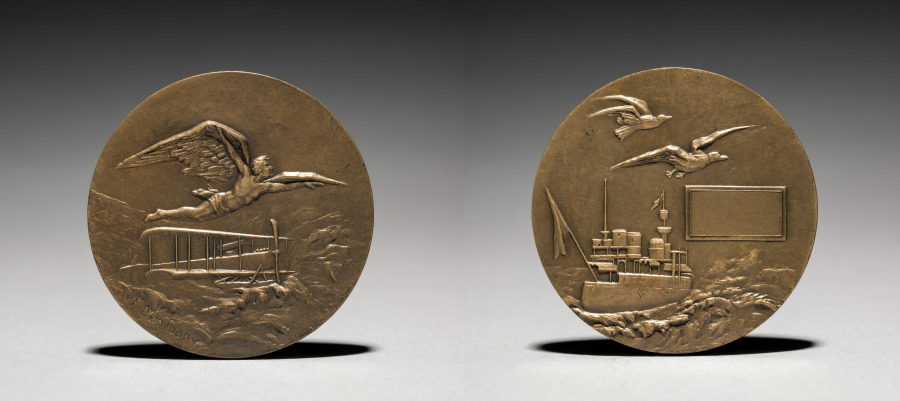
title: Medallion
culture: France, 19th century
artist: F. Montagny (French)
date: c.1920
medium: bronze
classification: Metalwork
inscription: signed: "F. Montagny."